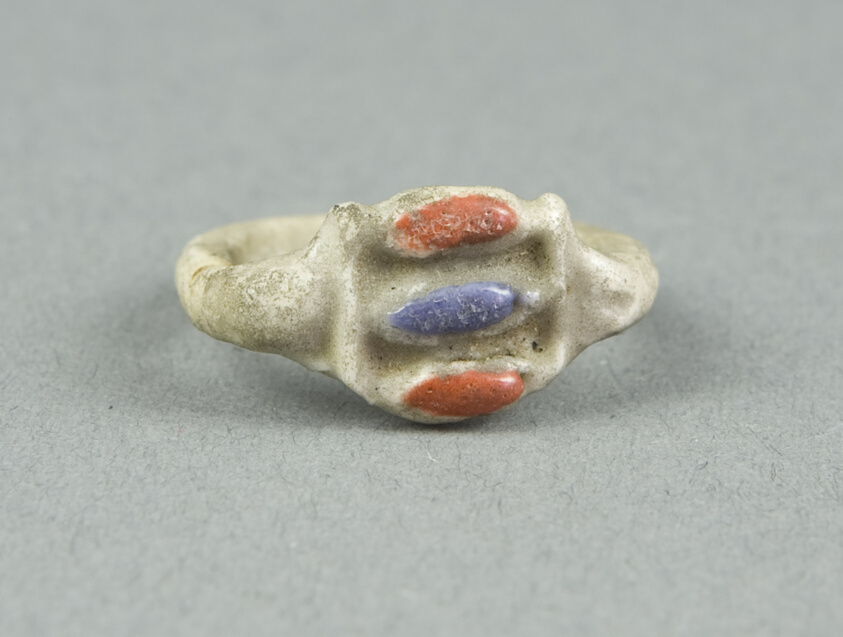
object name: Costume and Accessories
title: Ring with Inlaid Openwork Bezel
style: egyptian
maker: Egyptian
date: New Kingdom, Dynasty 18 (about 1350 BCE)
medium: Faience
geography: Egypt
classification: ring (jewelry); ceramics; jewelry; ancient art; costume; faïence (composite material)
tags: circles